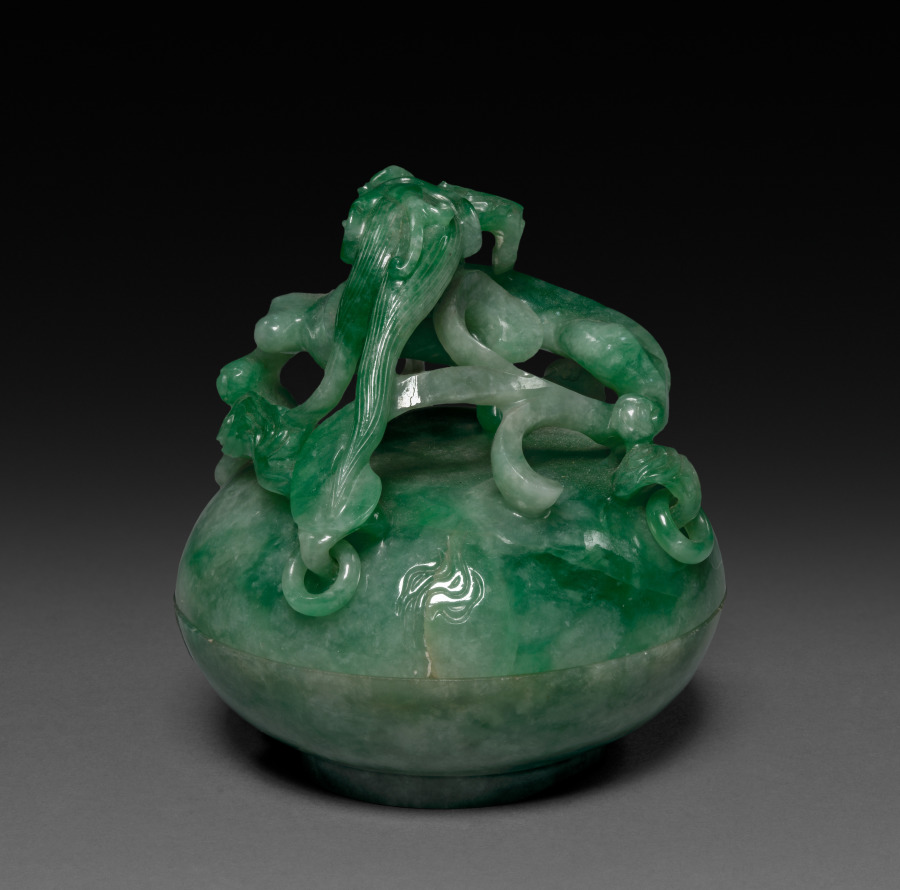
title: Three-Sectional Altar Group: Small Bowl with Carved Dragon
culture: China, Qing dynasty (1644-1911)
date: 1644–1911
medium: jade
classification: Jade